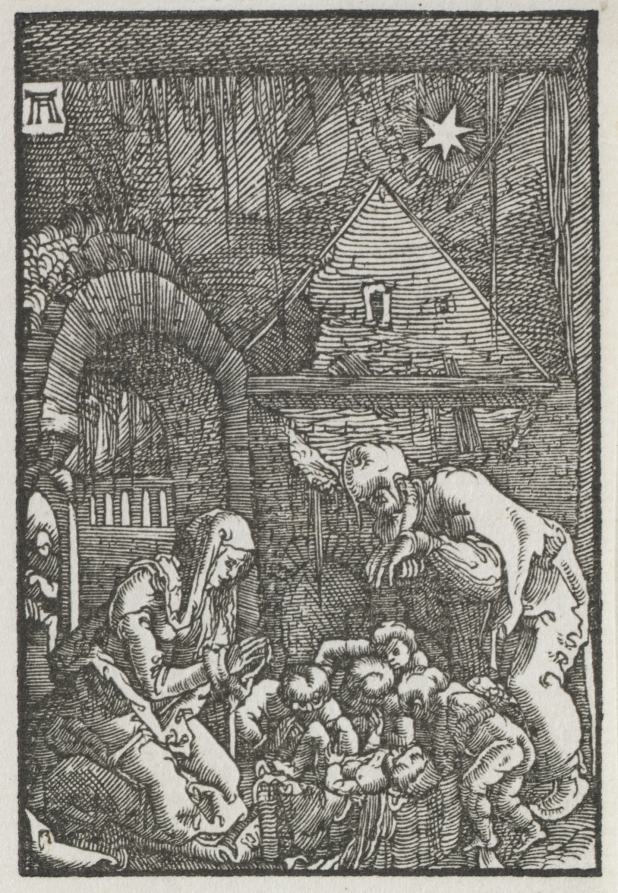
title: The Fall and Redemption of Man: The Nativity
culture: Germany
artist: Albrecht Altdorfer (German, c. 1480–1538)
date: c. 1515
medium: woodcut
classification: Print